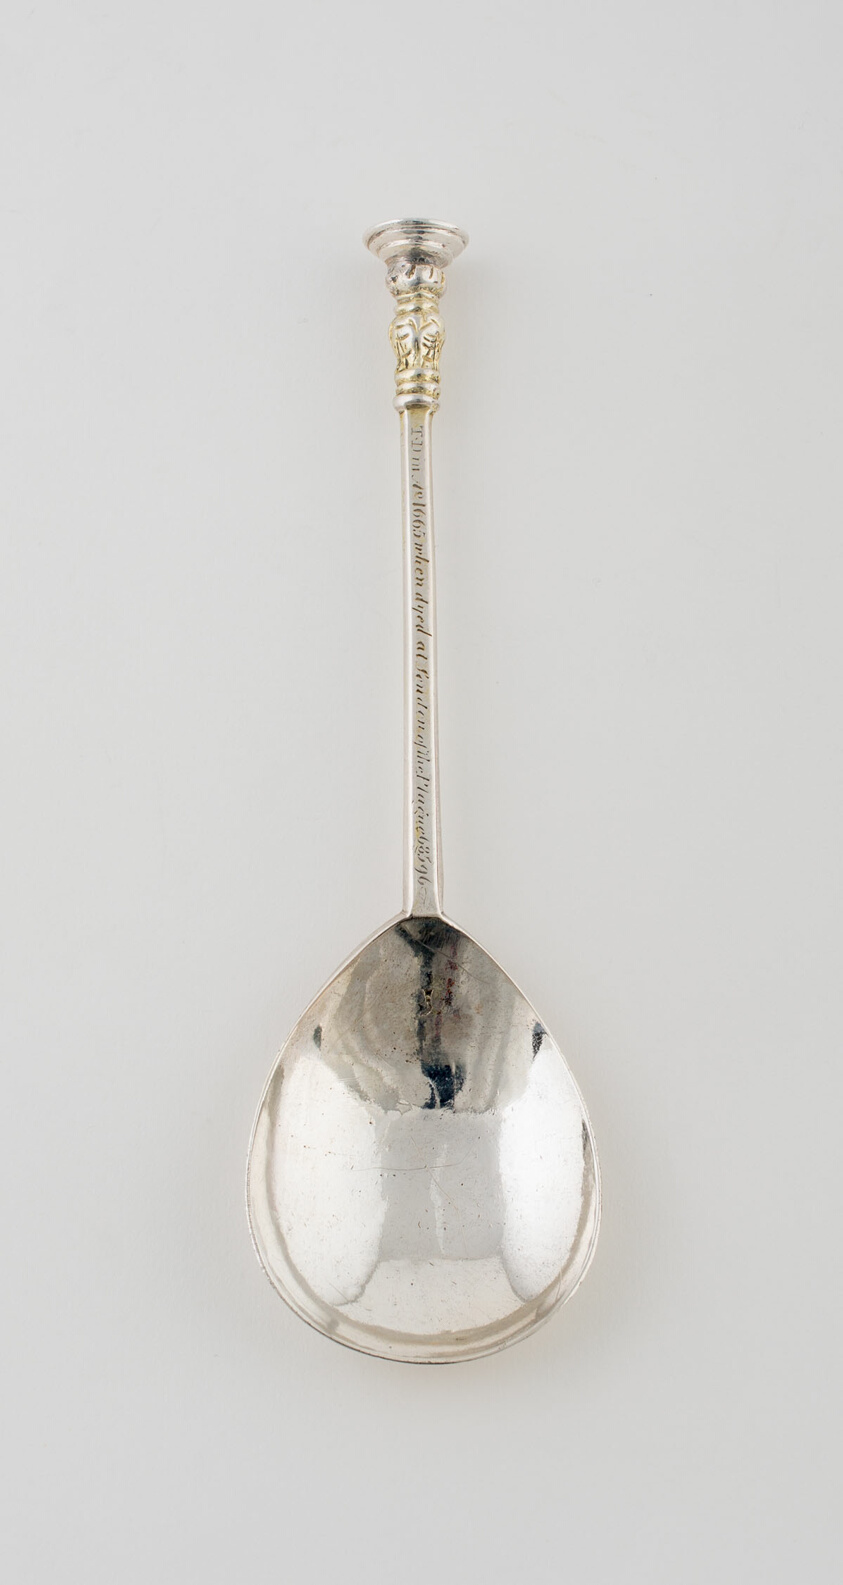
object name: Metalwork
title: Spoon Commemorating the London Plague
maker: Wokingham, England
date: c. 1665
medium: Silver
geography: Wokingham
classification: silver; metalwork; european decorative arts